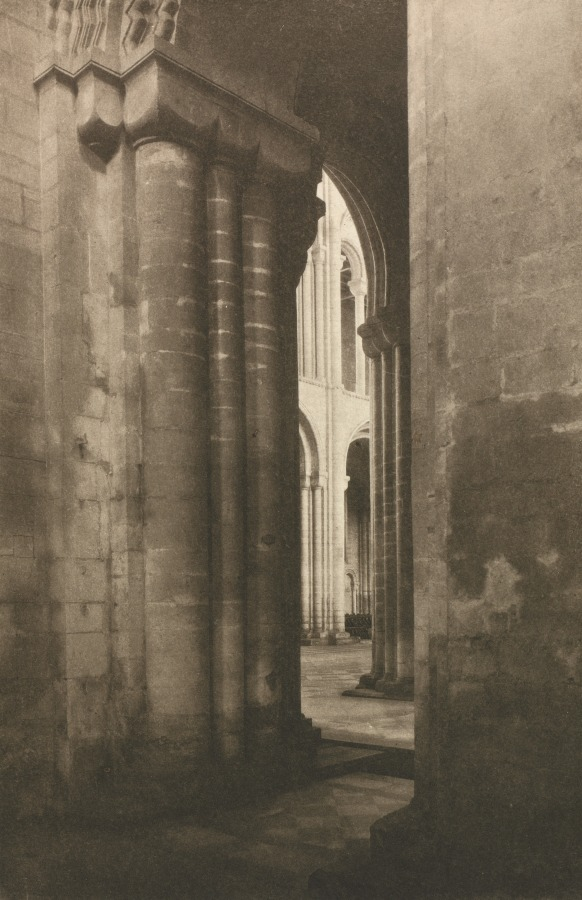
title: Camera Work: Ely Cathedral: A Memory of the Normans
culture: England, 20th century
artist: Frederick H. Evans (British, 1853–1943)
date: 1903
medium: photogravure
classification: Bound Volume